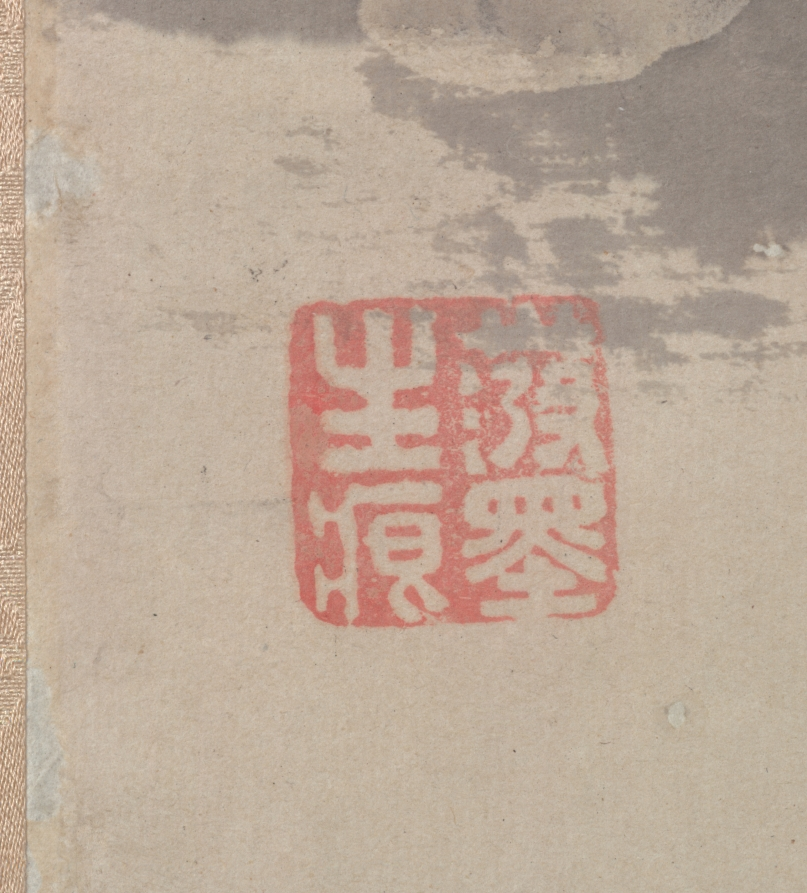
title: Snow Landscape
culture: Japan, Edo period (1615–1868)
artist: Yosa Buson (Japanese, 1716–1783)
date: mid-1770s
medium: hanging scroll; ink and color on paper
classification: Painting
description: In this painting, the mountains and sky glow with a hidden warmth from undertones in red as birds descend into the trees around a scholar’s retreat. Yosa Buson is recognized in Japanese literary history as one of the country’s greatest poets, but he was also an accomplished, self-taught painter. His style changed over the course of his career. Initially painting with precise brushwork, he gradually developed a freer style like the one he used in this snowscape.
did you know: One of the artist's seals reads: "flung ink gives life to brush lines."